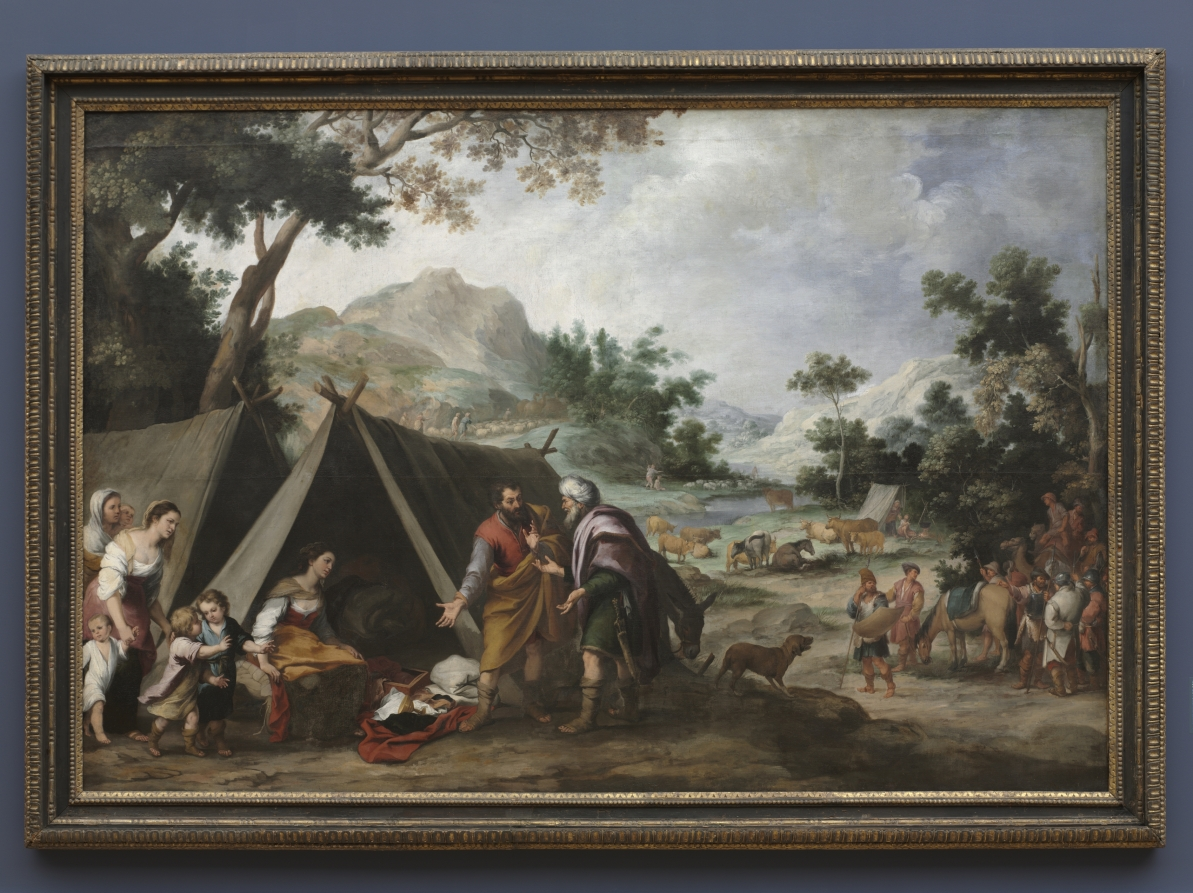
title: Laban Searching for His Stolen Household Gods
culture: Spain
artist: Bartolomé Esteban Murillo (Spanish, 1617–1682)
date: c. 1665–70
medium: oil on canvas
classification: Painting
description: This story comes from the Old Testament book of Genesis and stresses the value of reconciliation. Jacob lived with his uncle Laban for years, marrying Laban’s daughters Rachel and Leah. When the relationship between the men soured, Jacob and his family departed, while Rachel secretly stole her father’s household gods. When Laban discovered that the statues were missing, he pursued Jacob, accusing him of theft. Here, Jacob invites Laban to search his tent, while Rachel sits on the saddlebag containing the statues. After coming up empty-handed, Laban proposes a truce, ending the squabble.